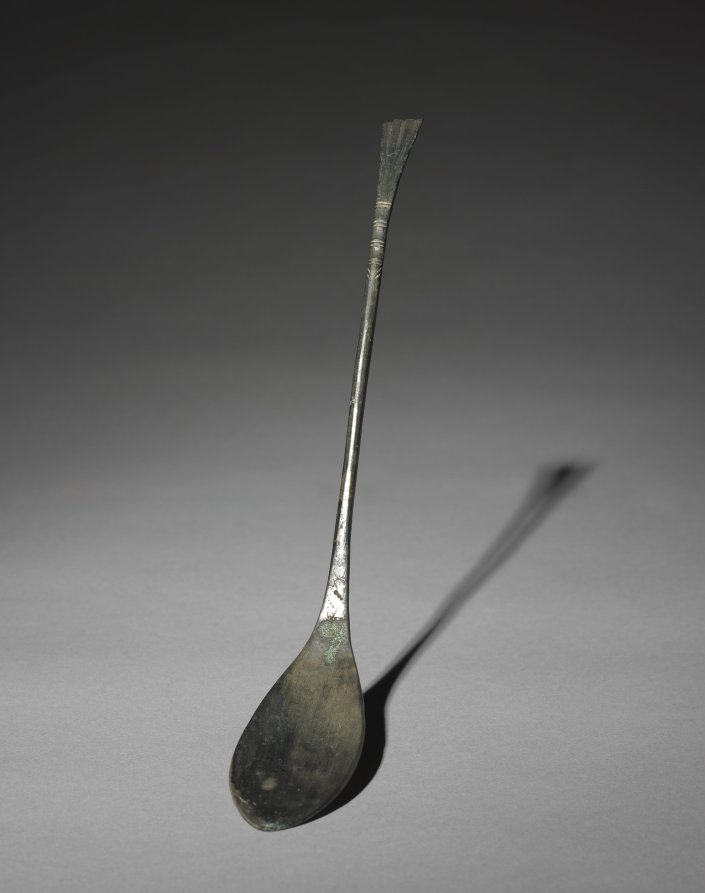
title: Spoon with Fish-Tail Design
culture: Korea, Goryeo dynasty (918–1392)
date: 918–1392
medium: bronze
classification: Metalwork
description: Many of Goryeo period spoons like this one feature a curved handle that splits into a jagged fishtail design. This fishtail design is not unique to Korea; it was also widely used in the area under the rule of two non-Han Chinese states: Liao (907–1125) and Jin (1115–1234). These seemingly ordinary objects testify to exciting material interactions between the Goryeo dynasty and non-Han Chinese northern states, which were often omitted from the official records.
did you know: Bronze spoons are the most common burial item. Scholars have proposed that toward the end of the 14th century, Koreans enjoyed meat-based soups more than any other dishes, explaining why spoons became common household items as well as burial goods.